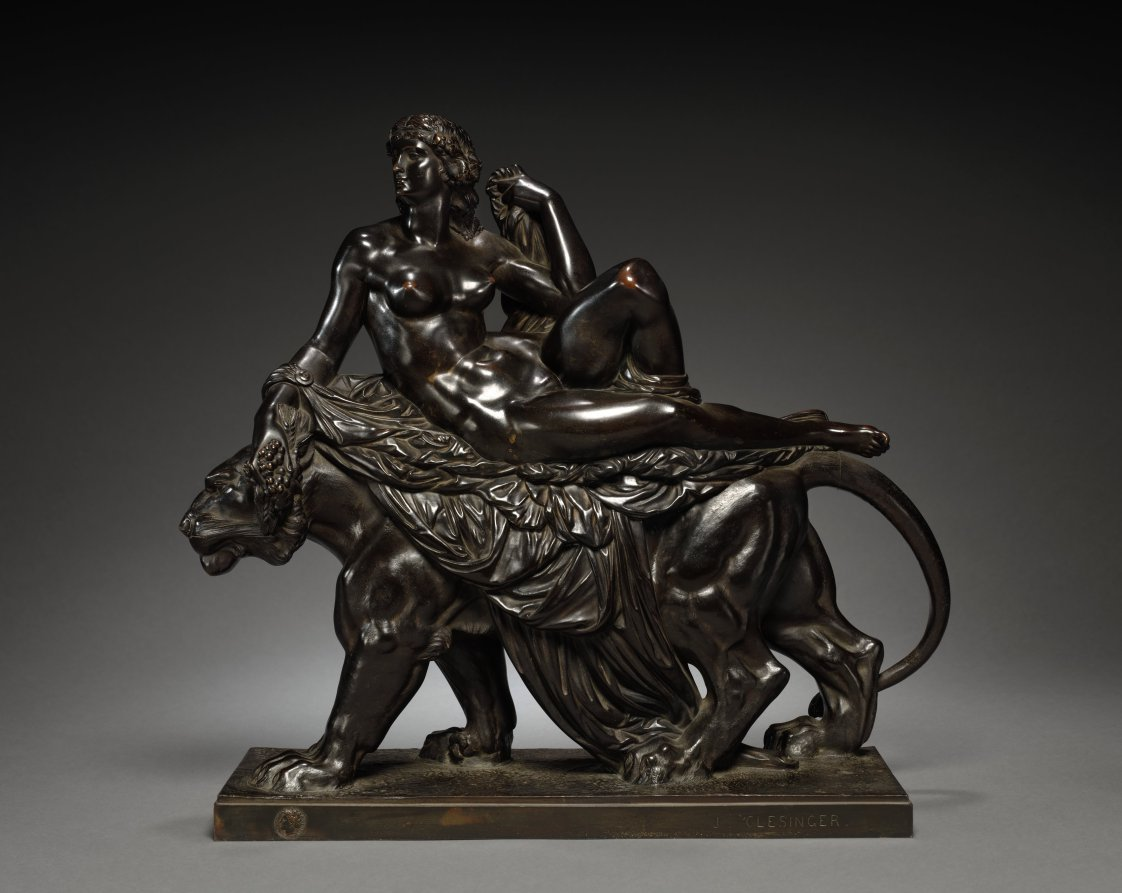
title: Ariadne on a Panther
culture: France, 19th century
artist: Jean-Baptiste Clésinger (French, 1814–1883)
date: 1873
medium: bronze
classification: Sculpture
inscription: signed on side of base: "J. CLESINGER"; inscribed around edge of stamp: "BRONZE ARTISTIQUE/DE PARIS"; on cut of neck of woman, "CAYUZ"; on edge of base: "1 Rue de la PAIX."